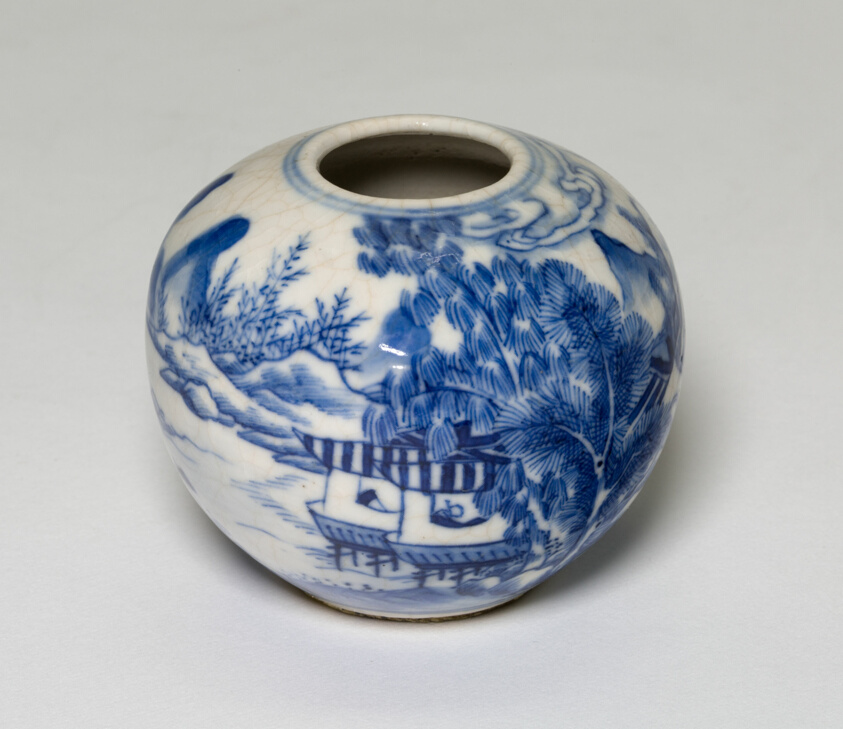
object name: Vessel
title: Miniature Jar with Landscape Scene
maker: China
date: Qing dynasty (1644–1911), Kangxi period (1662–1722)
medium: Porcelain painted in underglaze blue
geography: China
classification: porcelain; asian art; ceramics